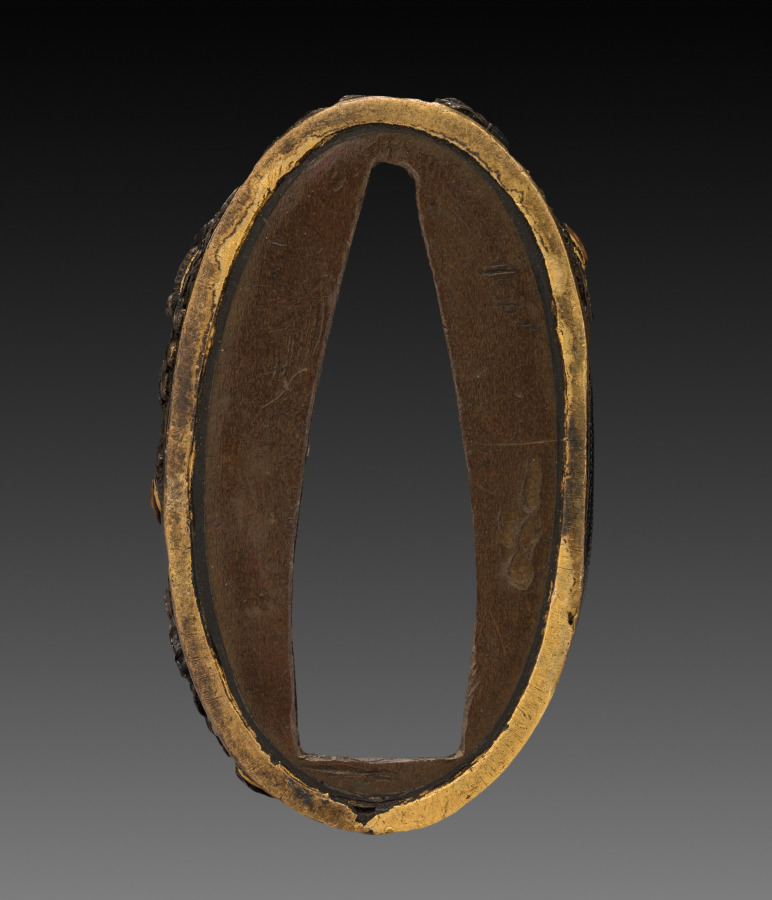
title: Sword-Hilt Collar (Fuchi)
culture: Japan, Edo period (1615–1868)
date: 1700–1850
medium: shakudo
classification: Arms and Armor